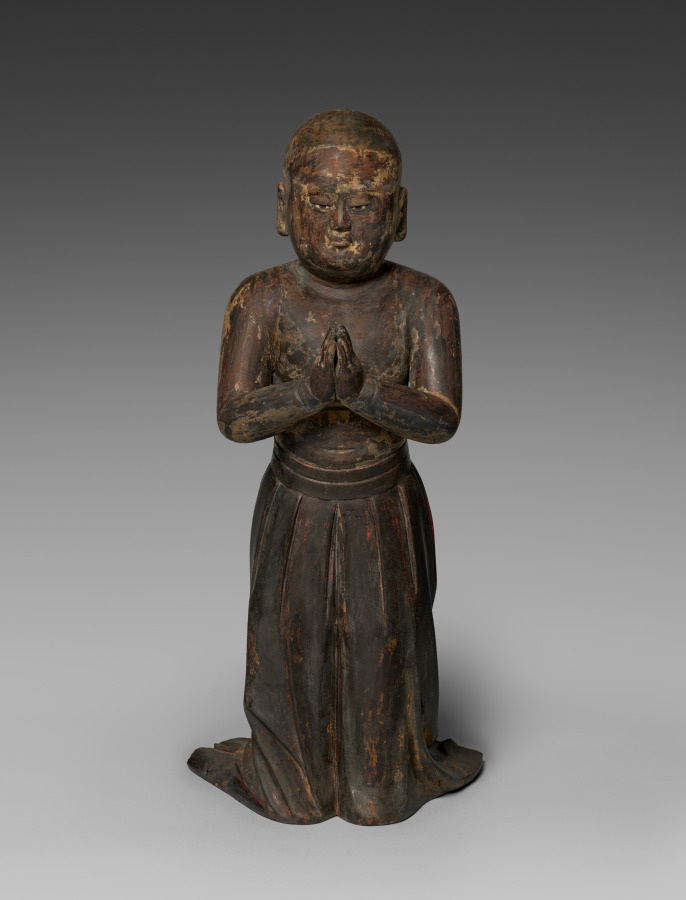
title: Prince Shōtoku at Age Two (Shōtoku Taishi)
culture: Japan, Kamakura period (1185–1333)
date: early 1300s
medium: Wood with lacquer, color, and rock-crystal inlaid eyes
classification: Sculpture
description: Two-year old Prince Shōtoku (573?–622?) places his palms together in a gesture called gasshō. Shōtoku played a major role in the introduction of Buddhism to Japan, and devotees of the prince commissioned painted and sculpted images commemorating important moments of his life. At age two, the prince faced east and chanted the name of the Buddha without having been taught the practice. This sculpture captures the fantastic event foreshadowing his future acts.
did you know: Shōtoku Taishi had several titles. One translates to "the prince of the stable door" because he was said to have been born in the imperial stables.